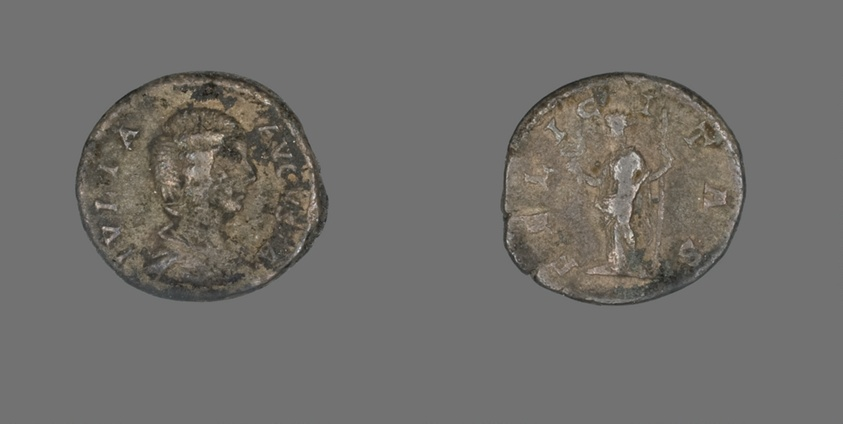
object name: Coin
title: Denarius (Coin) Portraying Julia Domna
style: roman (ancient, style or period), ancient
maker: Roman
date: 193-217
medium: Silver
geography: Roman Empire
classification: coin; ancient art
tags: portrait, woman